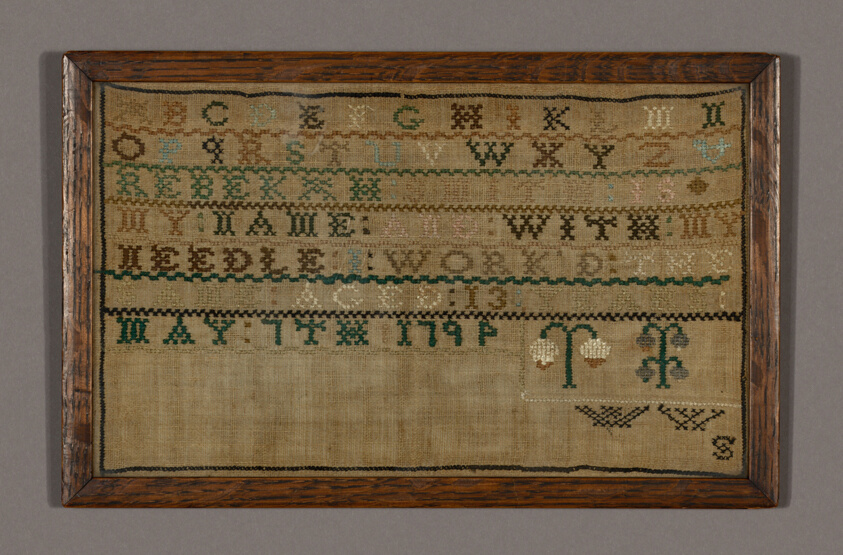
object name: Textile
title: Sampler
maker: Rebekah Smith (born 1780/81); United States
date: 1794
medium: Linen, plain weave; embroidered with silk in cross stitches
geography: United States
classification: textile; needlework (visual works); sampler